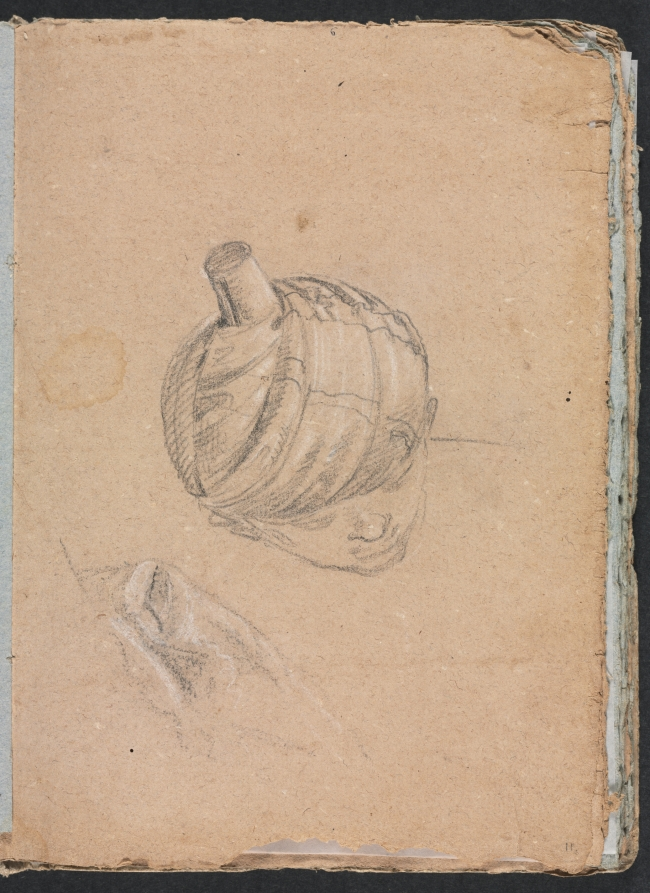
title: Verona Sketchbook: Head with turban (page 11)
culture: Italy, 18th century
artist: Francesco Lorenzi (Italian, 1723–1787)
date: 1760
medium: black chalk with white heightening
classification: Bound Volume